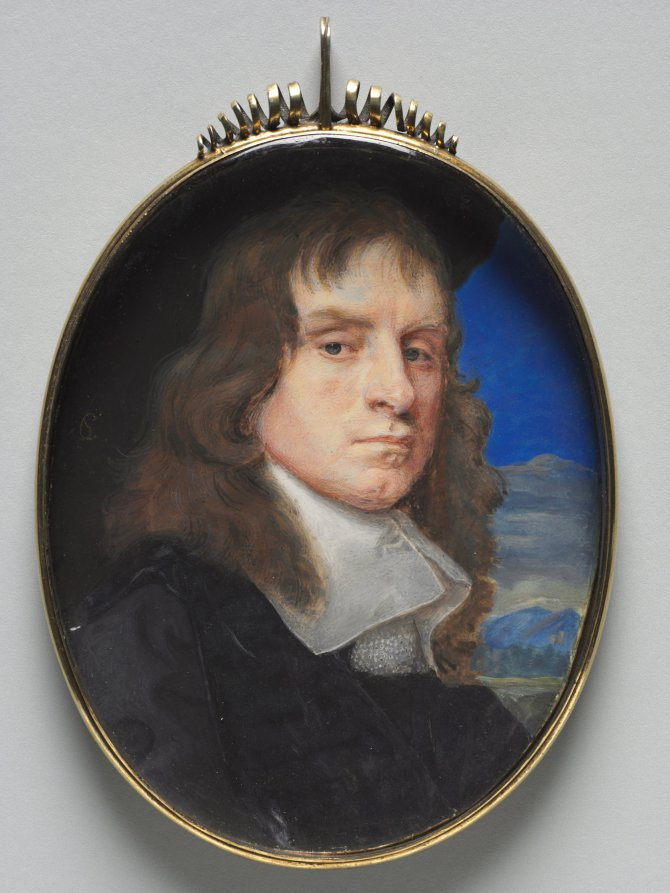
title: Portrait of a Man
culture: England, 17th century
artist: Samuel Cooper (British, 1608/09–1672)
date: c. 1655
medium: watercolor on vellum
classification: Portrait Miniature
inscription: signed left: SC [monogram]